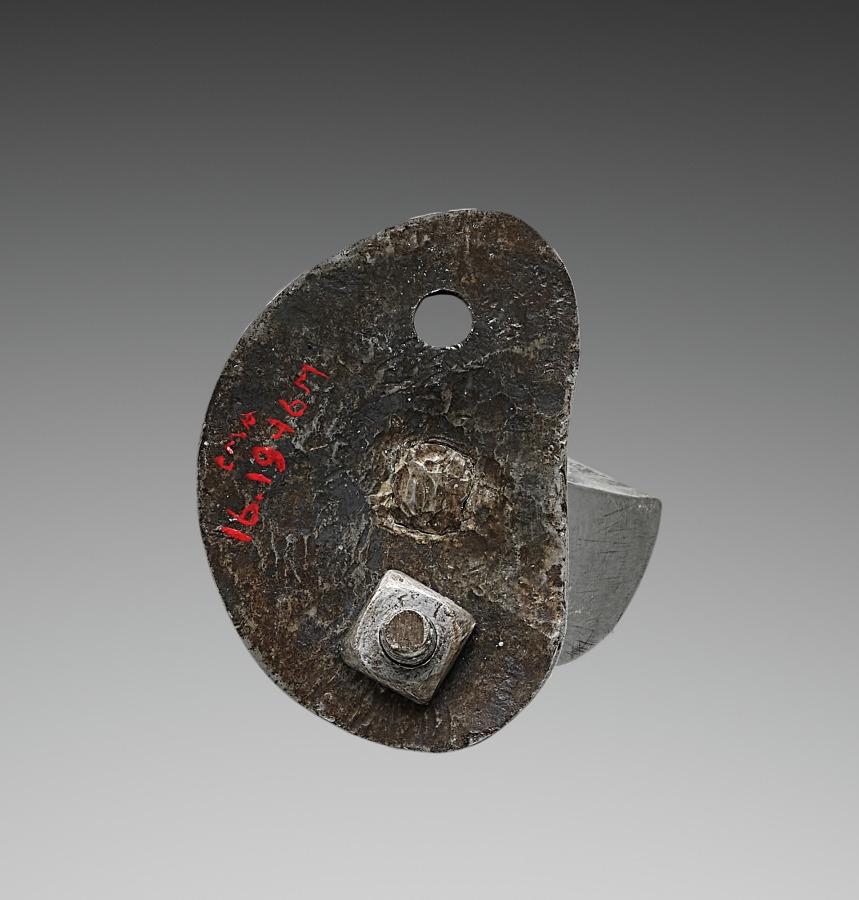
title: Lance Rest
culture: Germany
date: c.1550–1570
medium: iron, steel, leather and brass rivets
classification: Arms and Armor